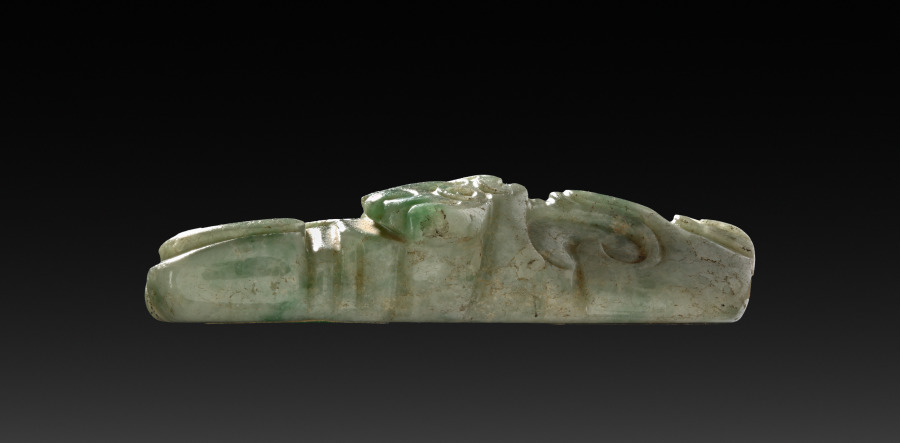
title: Pendant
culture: Maya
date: 250–900 CE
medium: jadeite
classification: Jade